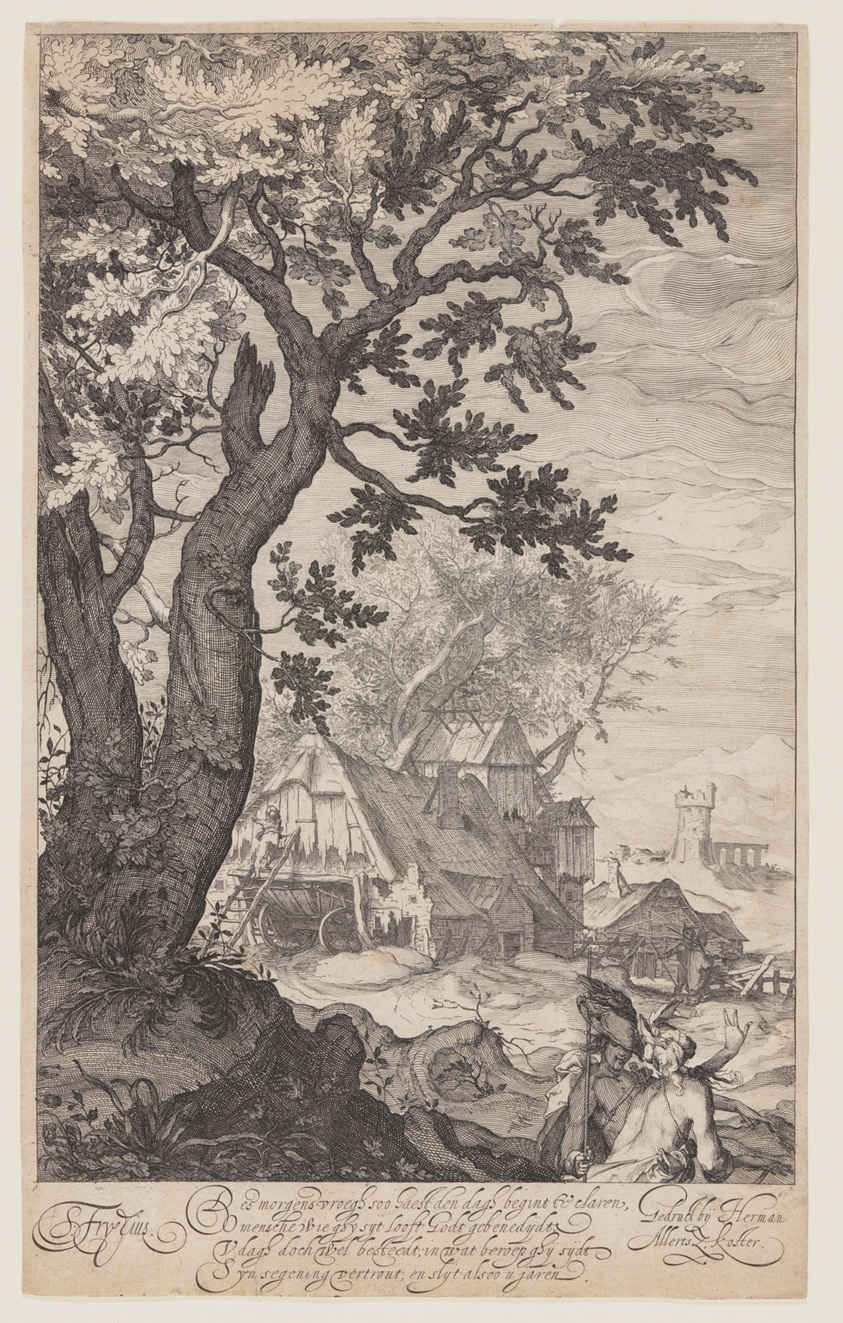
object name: Print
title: Landscape with a Farmhouse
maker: Simon Frisius (Dutch, c. 1580–1629); after Abraham Bloemaert (Dutch, 1566–1651)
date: after 1607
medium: Etching on ivory laid paper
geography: Netherlands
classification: etching; paper; print; prints and drawing